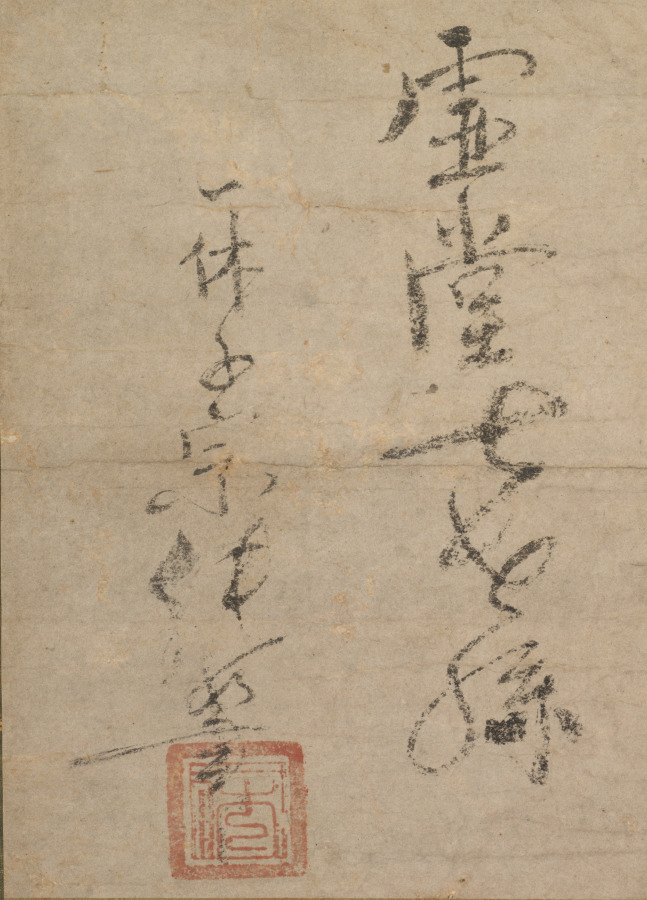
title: Reflections of Priest Foyen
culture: Japan, Muromachi period (1392–1573)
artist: Ikkyū Sōjun (Japanese, 1394–1481)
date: 1400s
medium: hanging scroll, ink on paper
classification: Painting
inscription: signed: "Kido nanasei son, Ikkyūshi Sōjun sho (Written by Ikkyū Sōjun, the seventh generation of Kido)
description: Left by his mother at a small Zen temple in Kyoto at the age of six, Ikkyu later drew on his early studies and experiences for his writings, which focused on his keen interest in the Chinese classics. Poetry in particular was a favorite subject and images from classical poetry or passages from favorite poems or commentaries frequently provided Ikkyu with the core ideas for his own work. A rare example of his calligraphy, this narrow scroll contains a verse in eight phrases, each comprising four characters. The whole verse is organized in three towering lines of brusque, emphatic calligraphy augmented by Ikkyu's signature-the two lines of running script in the lower left corner. The text refers to a passage included in the Chronicle of the Zen Sect that contains a cautionary reminder attributed to the legendary Chinese monk Foyen Qingyuan (1067-1120), long revered in Japan. The initial phrase begins: "Life is a mirage."